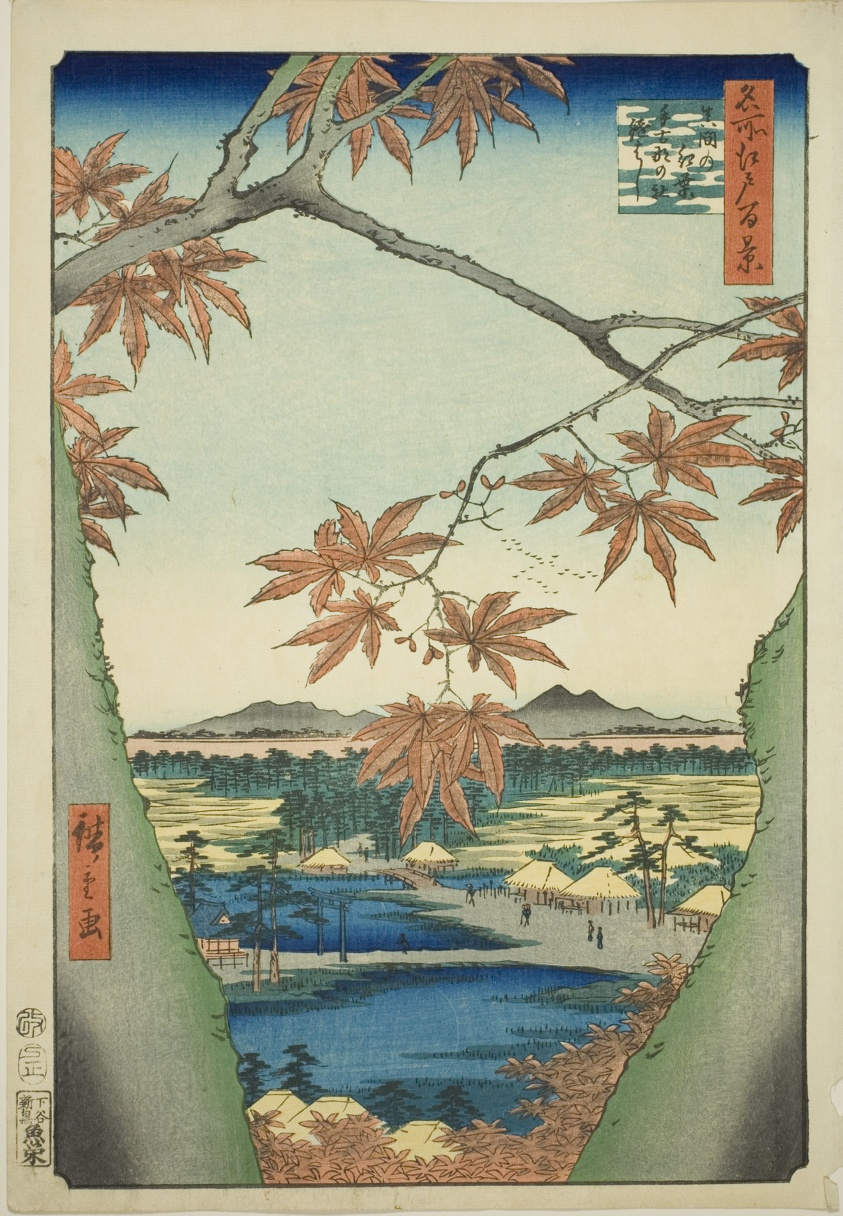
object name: Print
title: Maple Trees at Mama, Tekona Shrine and Tsugi Bridge (Mama no momiji, Tekona no yashiro, Tsugihashi), from the series "One Hundred Famous Views of Edo (Meisho Edo hyakkei)"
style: Japanese (culture or style)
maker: Utagawa Hiroshige 歌川 広重; Japanese, 1797-1858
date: 1857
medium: Color woodblock print; oban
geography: Japan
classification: woodblock print; print; asian art